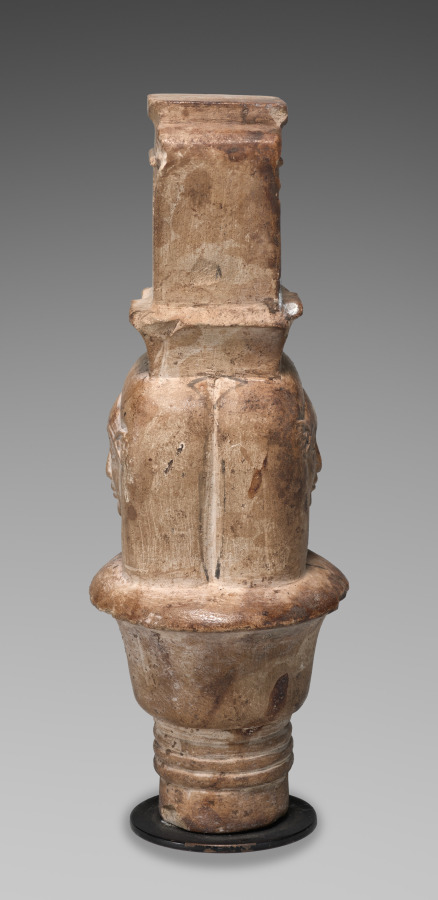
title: Votive Hathor Column Capital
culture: Egypt, Late period (715–332 BCE), Dynasty 30–Greco-Roman period (332 BCE–395 CE), Ptolemaic dynasty (305–30 BCE)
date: 380–30 BCE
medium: limestone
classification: Sculpture